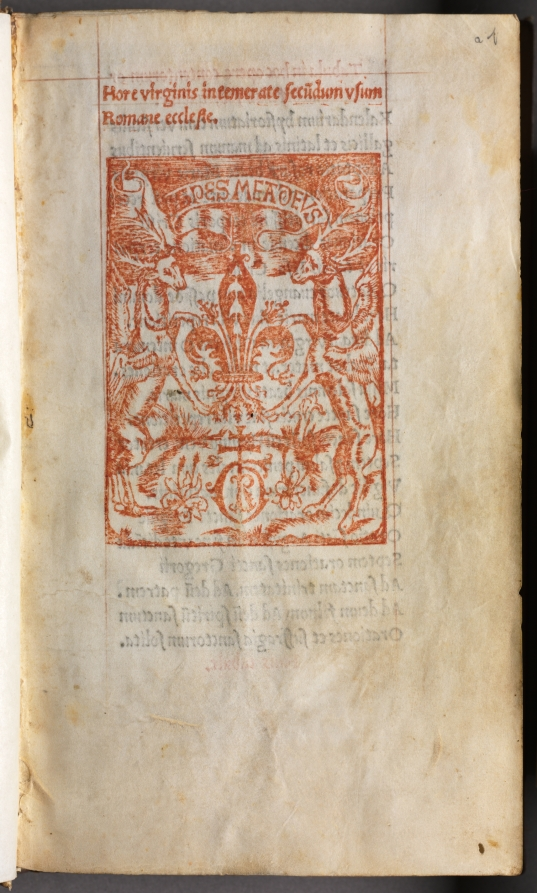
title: Printed Book of Hours (Use of Rome): fol. 1r, Printers Mark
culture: France, Paris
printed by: Guillaume Le Rouge (French, Paris, active 1493–1517)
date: 1510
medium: 112 Printed folios on parchment, bound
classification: Bound Volume